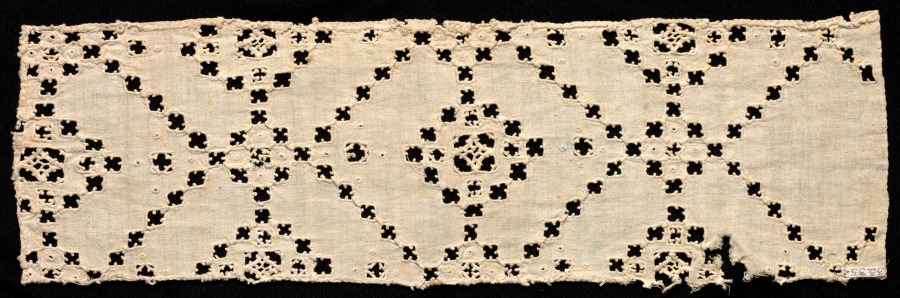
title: Lace Fragment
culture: Italy, 1660-1699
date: 1660–99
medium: Linen: needle lace (cutwork)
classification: Lace